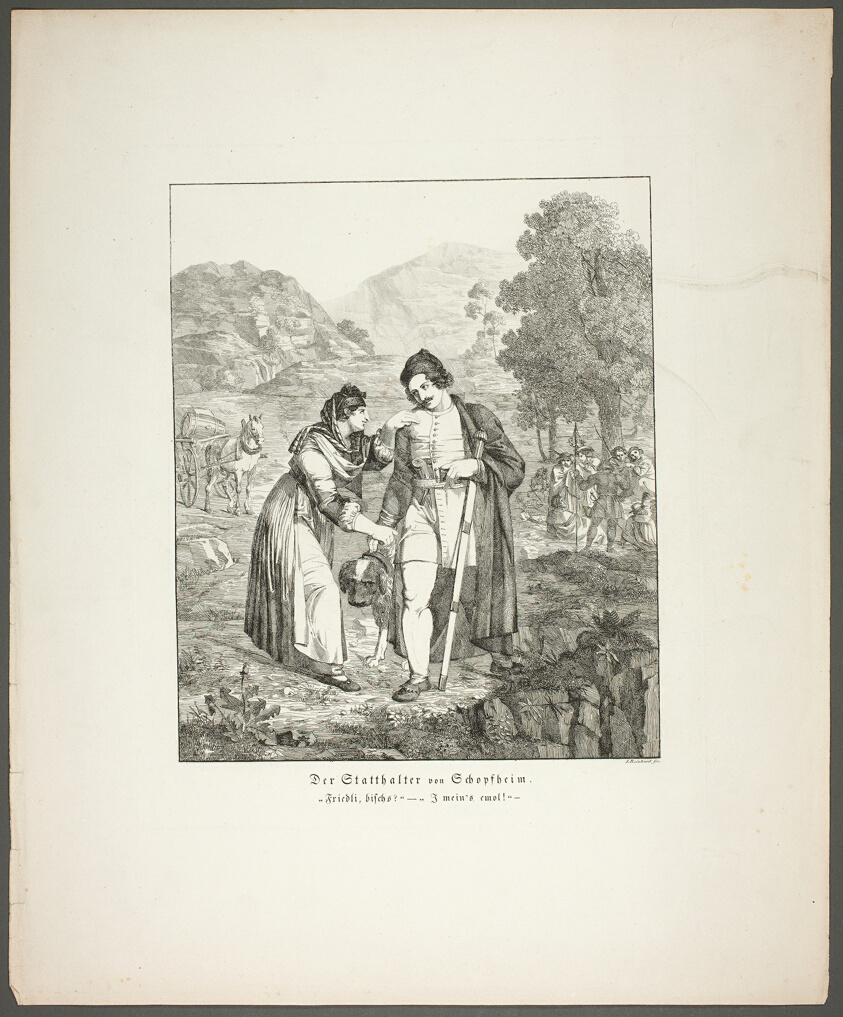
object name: Print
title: The Governor of Schopfheim (Der Statthalter von Schopfheim), plate seven from the series Poems in the Dialect of the Upper Rhine Region (Zehn Blätter Zu Hebels Alemannischen Gedichten)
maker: Sophie Reinhard (German, 1777-1843); published by Mohr und Winter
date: 1820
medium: Etching on cream wove paper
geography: Germany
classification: etching; print; prints and drawing